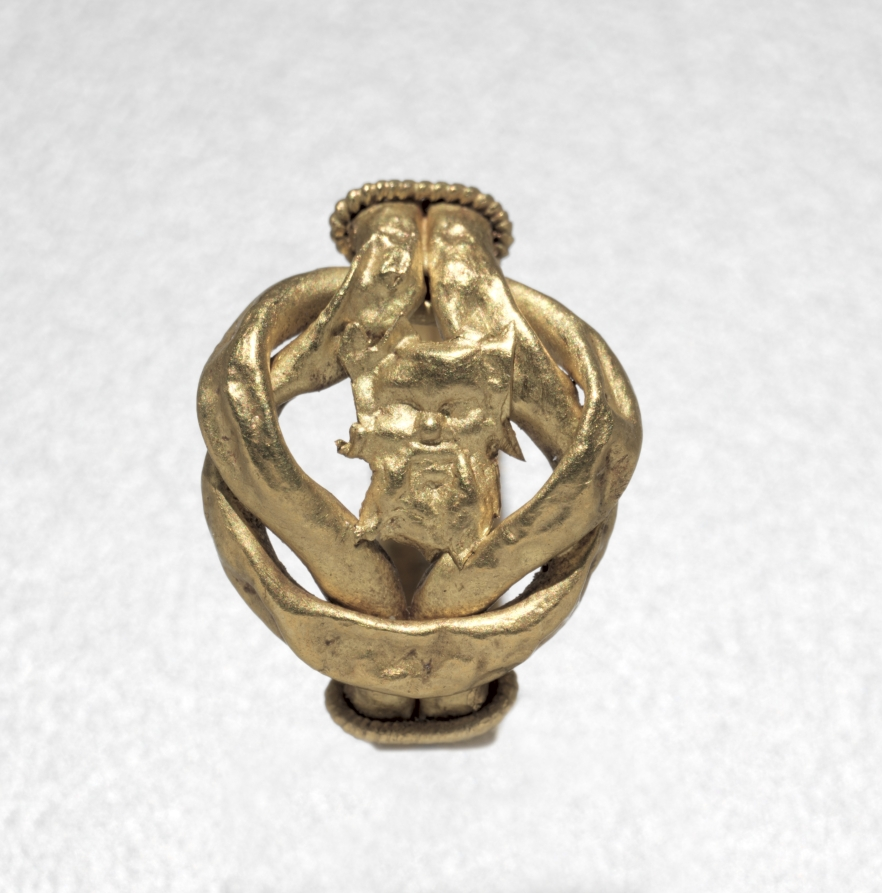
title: Ring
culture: Greece or Italy, Rome (?)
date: before 1916 this is common era, not BCE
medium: gold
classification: Jewelry